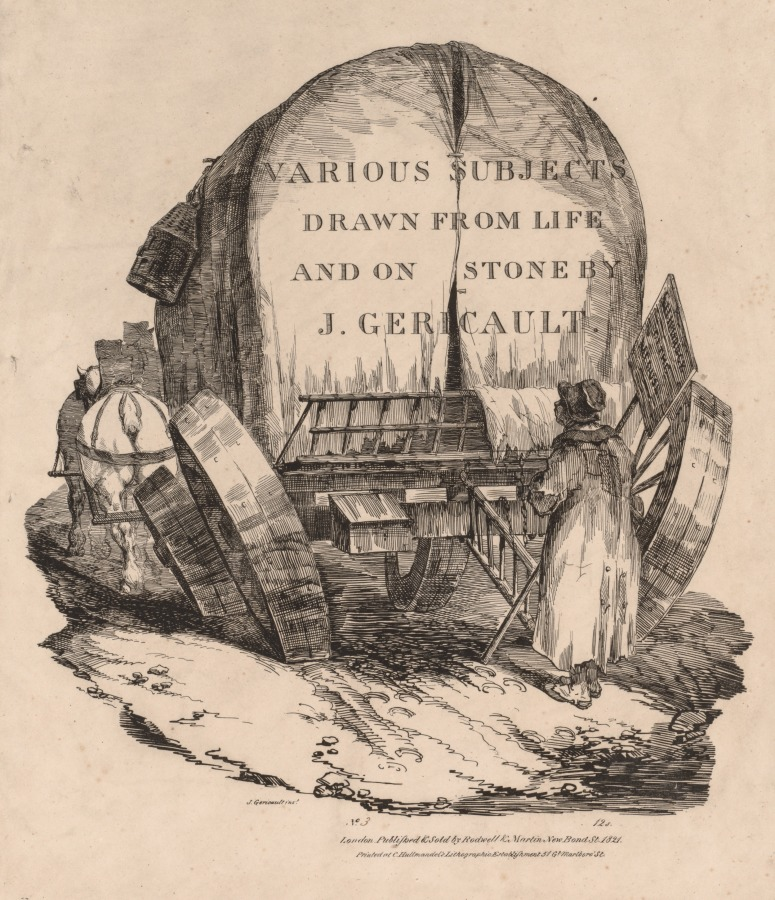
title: Various Subjects Drawn from Life and on Stone: A Wagon with Harnessed Horses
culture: France, 19th century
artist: Théodore Géricault (French, 1791–1824)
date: 1821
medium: lithograph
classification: Print